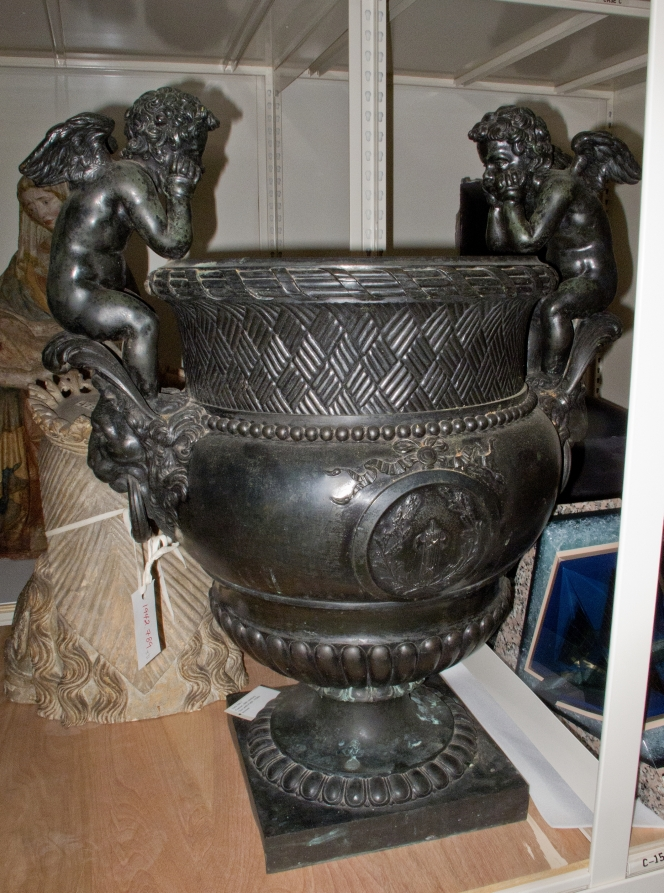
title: Urn with Putti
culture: France, 18th century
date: 1700s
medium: bronze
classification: Metalwork